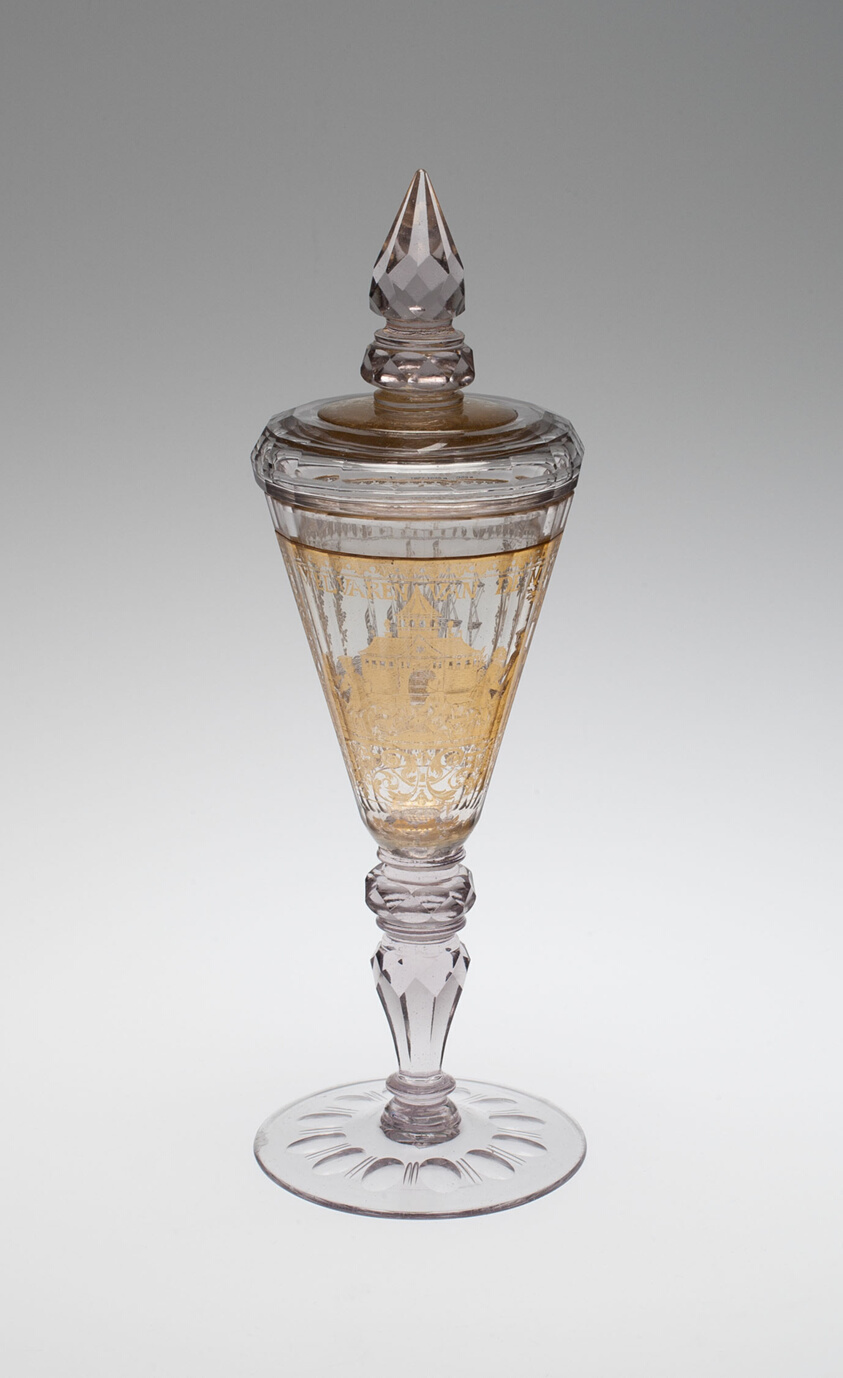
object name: Glass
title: Covered Goblet (Pokal)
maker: Bohemia, Czech Republic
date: c. 1730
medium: Double-walled glass with gold leaf decoration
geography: Bohemia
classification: drinking vessel; glass; european decorative arts